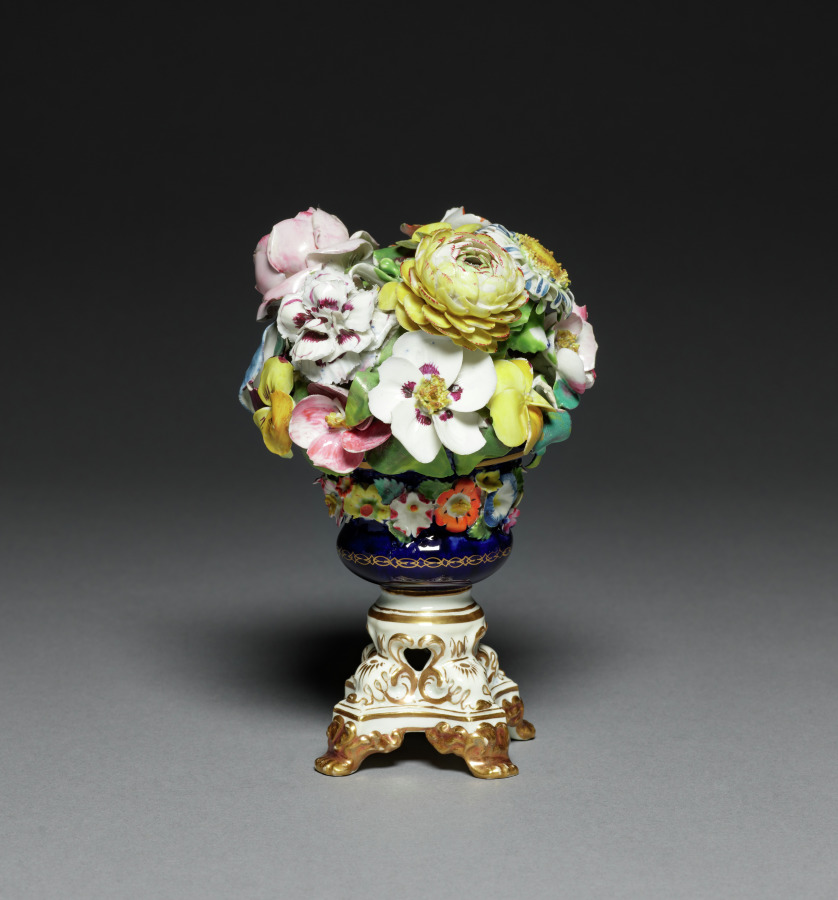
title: Flower Pot and Flowers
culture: England, Derby, 19th century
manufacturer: Derby Porcelain Factory (Bloor Period) (British)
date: 1811–1848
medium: artificial porcelain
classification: Ceramic